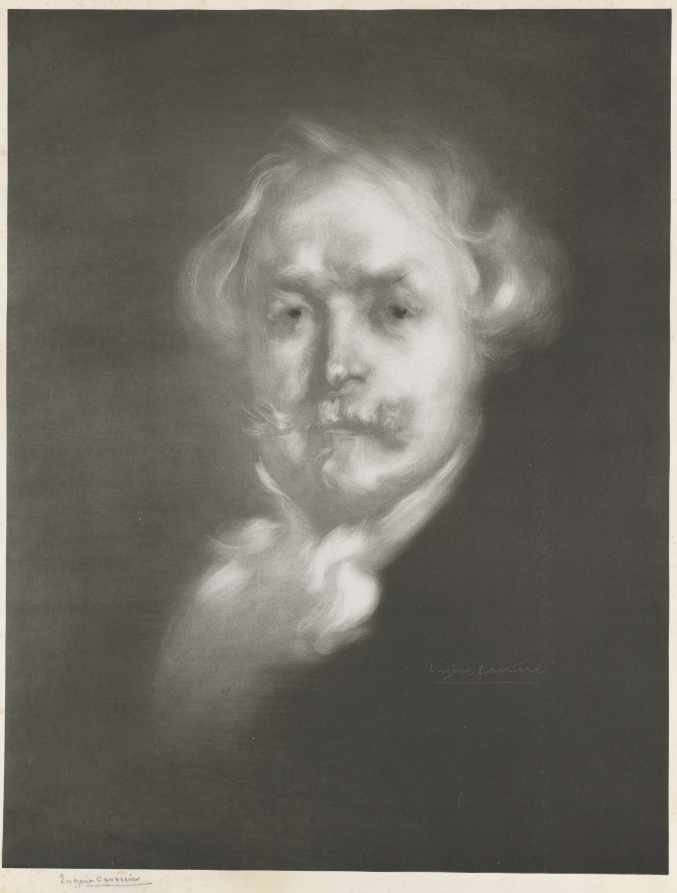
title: Edmond de Goncourt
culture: France, 19th century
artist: Eugène Carrière (French, 1849–1906)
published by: l'imprimeur Lemercier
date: 1896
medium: lithograph on chine collé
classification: Print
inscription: lower left margin: signed in pencil, "Eugene Carriere"